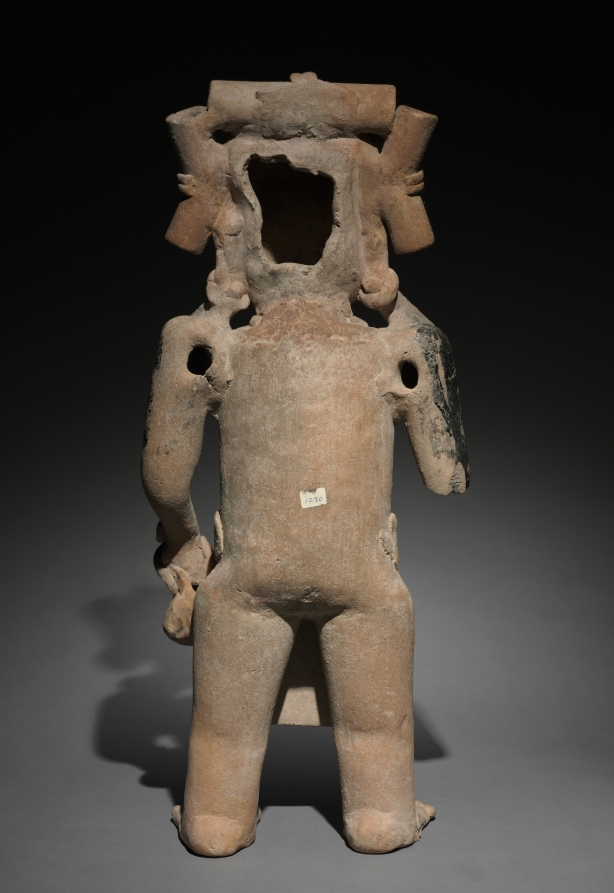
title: Standing Male Figure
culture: Mexico, Gulf Coast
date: 300–900 CE (thermoluminescence date, 240–945 CE)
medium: earthenware, asphalt and resin paint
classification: Sculpture